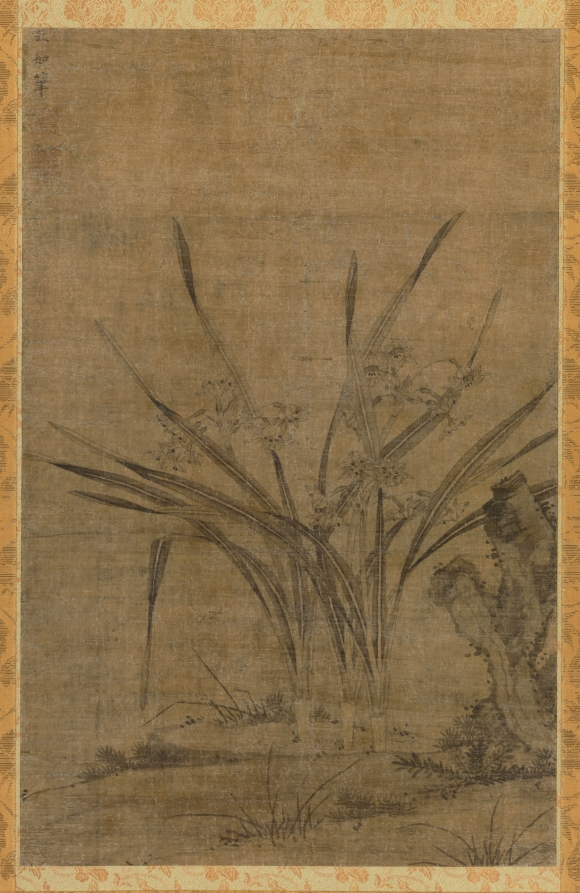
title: Narcissus and Rocks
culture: China, Ming dynasty (1368–1644)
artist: Lu Tianru (Chinese, first half of 1400s)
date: 1368–1644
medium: hanging scroll, ink on silk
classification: Painting